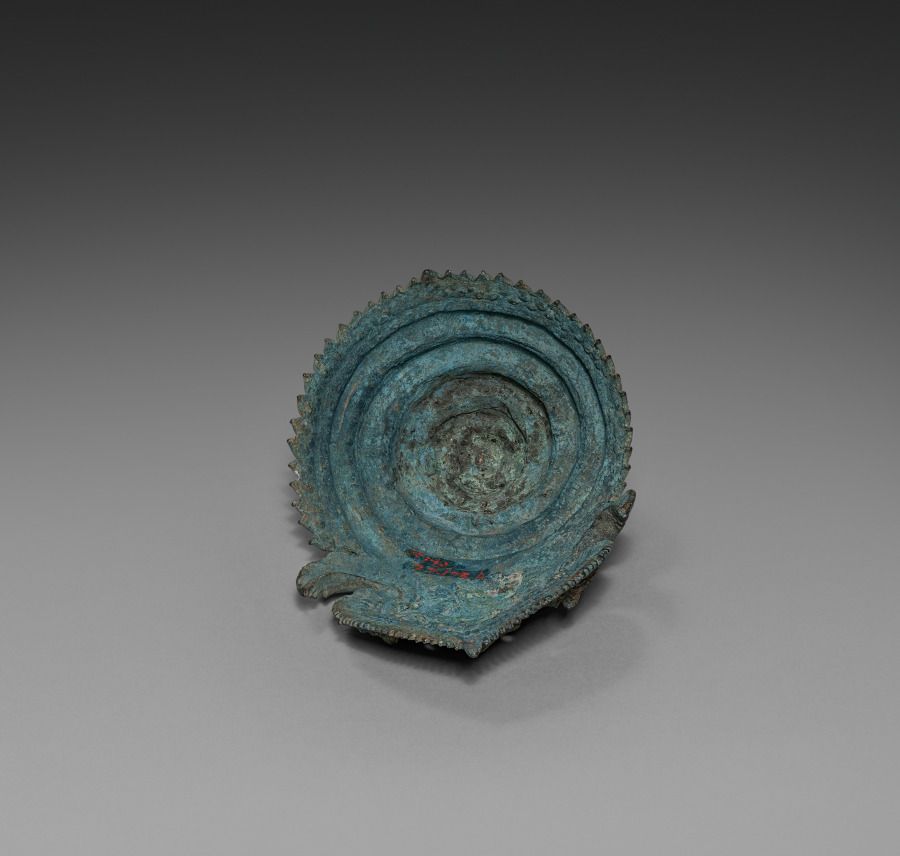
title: Ritual conch shell base with dancing Hevajra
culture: Cambodia, Khmer, Angkor Period, 12th-13th Century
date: 1100s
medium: shell and bronze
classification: Sculpture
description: A royal temple like Banteay Chhmar was built for performing rituals and to honor images of gods, Buddhas, and other sacred or enlightened beings for the sake of the kingdom’s protection and ongoing prosperity. Conch shells were blown at the start of rituals to make the sound corresponding to the syllable om. The dancing figure of Hevajra, a Buddhist being of enlightenment with eight heads, sixteen arms, and four legs, has been worked into the bronze embellishment of the shell. Hevajra was elevated to a prominent position in Khmer Buddhism of the Angkorian period as the standard figure denoting the practice of rituals prescribed in a text called the Hevajra-tantra. The tripod stand with three serpents is probably not original to the shell.